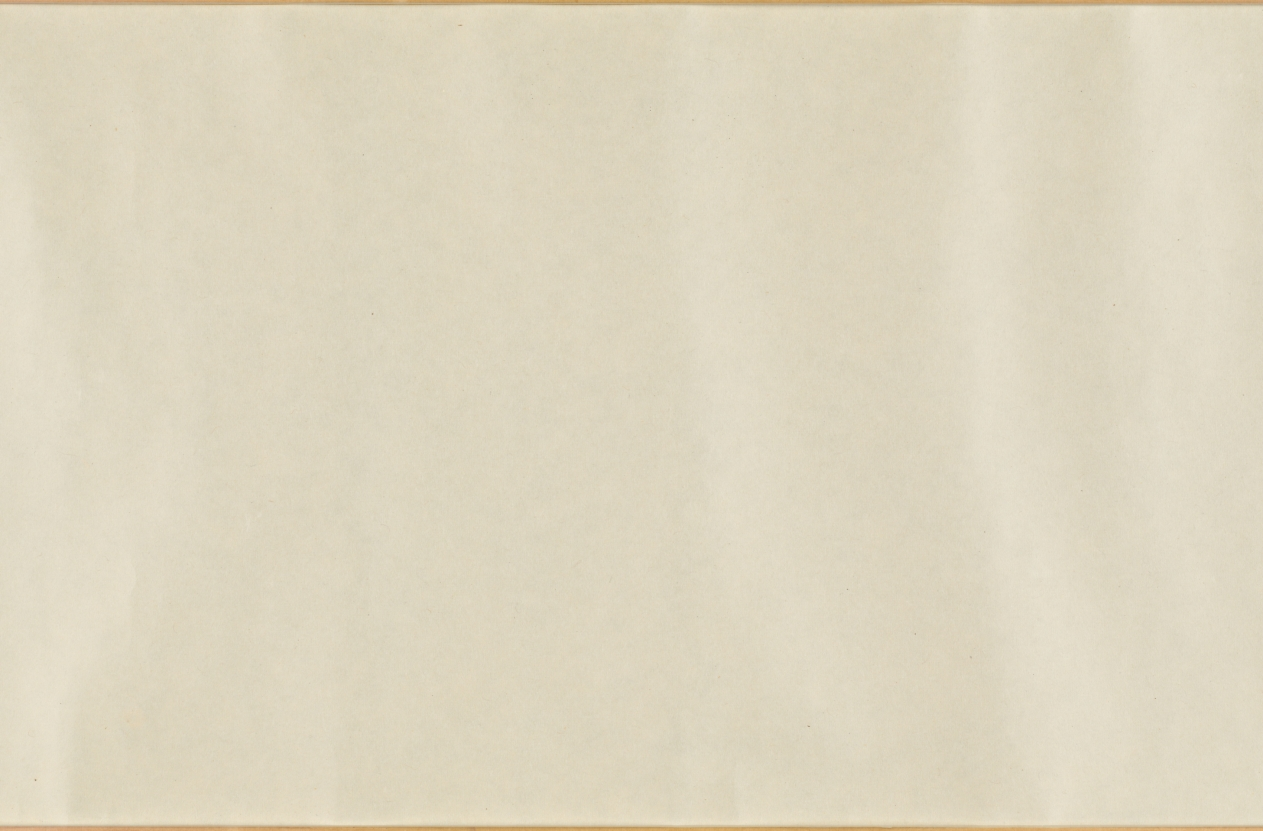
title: Selections from the New Collection of Japanese Poems from Ancient and Modern Times (Shinkokin wakashū) with Printed Designs of Chinese Lions and Crab Finger Grass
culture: Japan, Edo period (1615–1868)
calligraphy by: Hon'ami Kōetsu (Japanese, 1558–1637)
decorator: Tawaraya Sōtatsu (Japanese, c. 1570–c. 1640)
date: early 1600s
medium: handscroll; ink, gold, and silver on paper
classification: Calligraphy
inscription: Seal: 光悦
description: Hon’ami Kōetsu was a calligrapher and craftsman who frequently collaborated with the painter Tawaraya Sōtatsu, considered the first master of the Rinpa school. Kōetsu brushed seven poems from the autumn section of a poetry anthology onto dyed paper with motifs designed and printed in gold and silver by Sōtatsu.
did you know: Before becoming a master painter of screens, Tawaraya Sōtatsu painted fans.